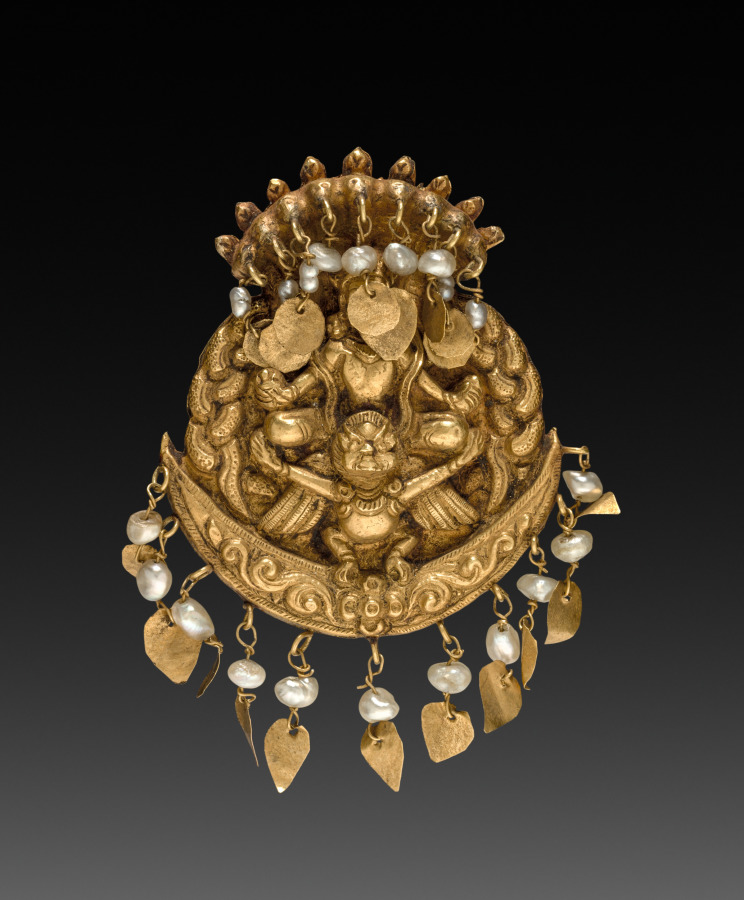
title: Earring with Four-Armed Vishnu Riding Garuda with Nagas (serpent divinities)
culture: Nepal, Kathmandu Valley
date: 1600s or 1700s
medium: repousse gold with pearls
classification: Jewelry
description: In Nepal, sculptures of deities were adorned with jewelry larger than pieces made for human beings. This pair of earrings features the Hindu god Vishnu seated cross-legged riding his mount the man-eagle Garuda. Garuda's arms are outstretched, grabbing the tails of serpents whose braided bodies snake up both sides of each earring. His wings drape like a cape behind him, and his talons clutch his crescent moon perch. Serpent hoods rise up behind Vishnu like a canopy.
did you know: Vishnu and Garuda are solar deities, and they sit on the crescent moon, so the light of both celestial bodies shines from these earrings.